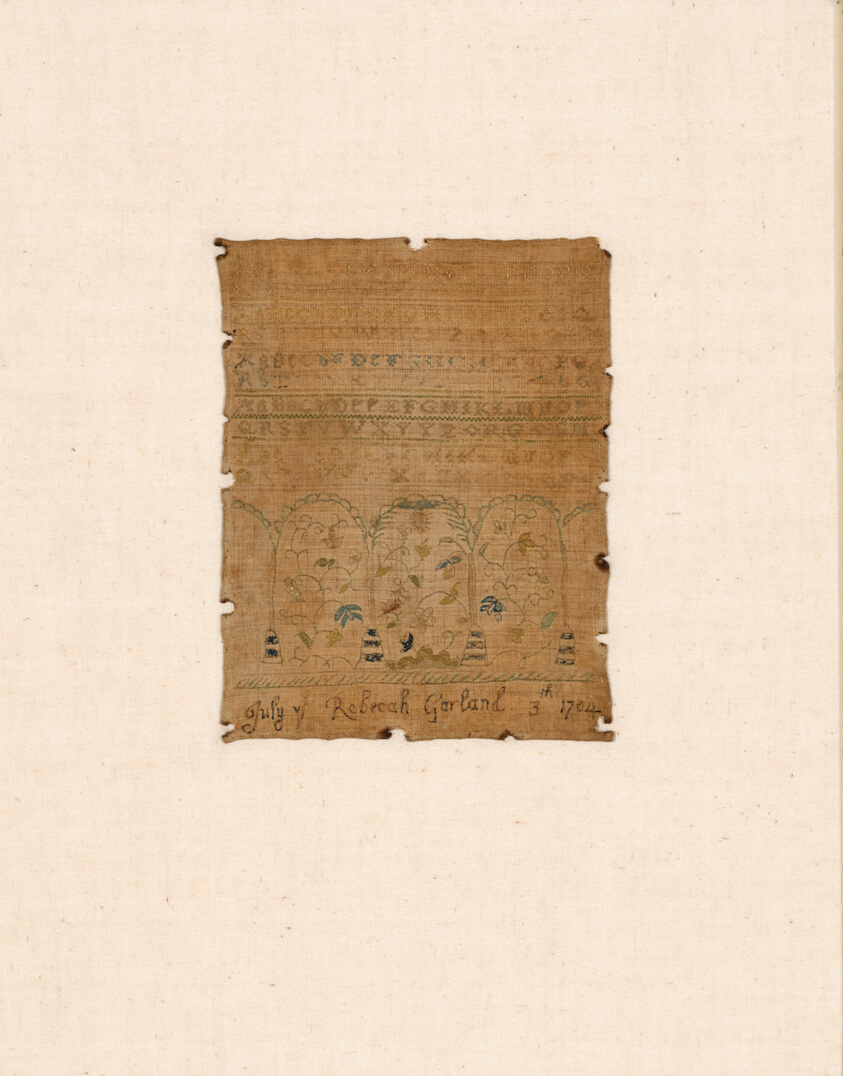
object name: Textile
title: Sampler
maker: Rebecah Garland (American, active c. 1704); United States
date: 1704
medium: Linen, plain weave; embroidered with silk floss in Algerian eye, buttonhole, cross and marking cross stitches; laid work and couching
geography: United States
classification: textile; needlework (visual works); sampler